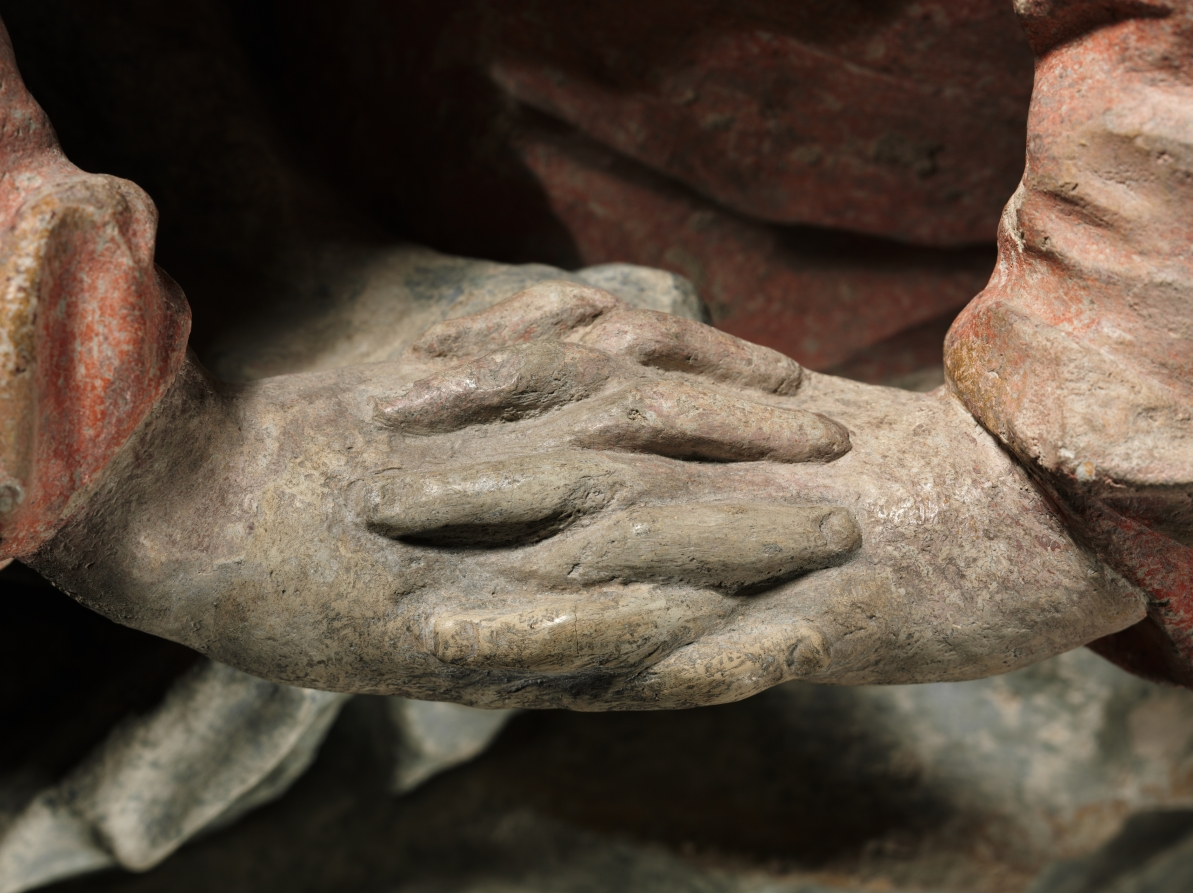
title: Mourning Mary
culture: Austria, Vienna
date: c. 1710–40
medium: stone with traces of original color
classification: Sculpture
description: This figure’s orientation suggests it may have been part of a Crucifixion group, situated to the left of Christ with another figure to the right to balance the composition. Fingers knotted in prayer, lips parted in anguish, the Virgin appears to recoil from the sight of her son on the cross. Her contorted pose and agitated draperies are visible manifestations of her grief. Obvious signs of wear to the stone suggest that the group may have been set outside of a church, perhaps atop pillars.